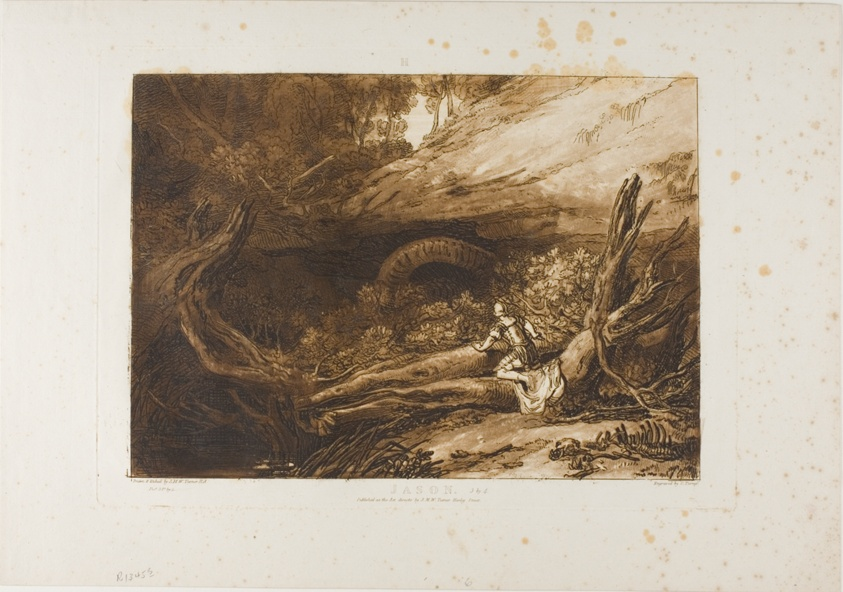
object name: Print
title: Jason, plate 6 from Liber Studiorum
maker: Joseph Mallord William Turner (English, 1775-1851); Engraved by Charles Turner (English, 1773-1857)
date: published 1807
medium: Etching and engraving in brown on ivory laid paper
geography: England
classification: etching; print; prints and drawing